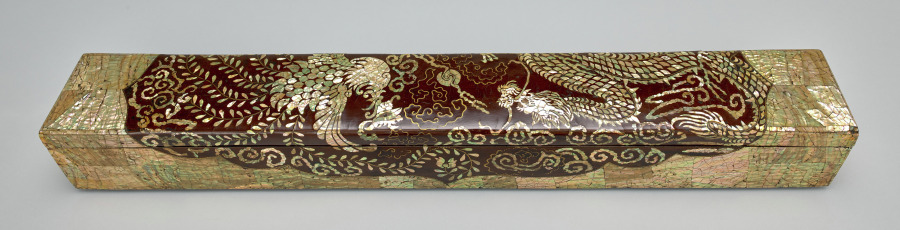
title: Scroll Box with Dragon and Phoenix Design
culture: Korea, Joseon dynasty (1392–1910)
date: 1800s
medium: lacquered wood inlaid with mother-of-pearl and twisted brass and copper wire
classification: Lacquer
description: This large rectangular box was designed for keeping a scroll or an important document. The mother-of-pearl inlaid lacquer rendering of a dragon and phoenix combines texture, color, and shape to produce a dazzling effect. The large and prominent designs of the Joseon-period inlaid lacquer, like on this box, replaced the fine detail and mosaic-like patterns popular in the Goryeo period (918-1392).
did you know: This technique of using the inlays of iridescent mother-of-pearl and abalone shells has been practiced in Korea for over a thousand years,